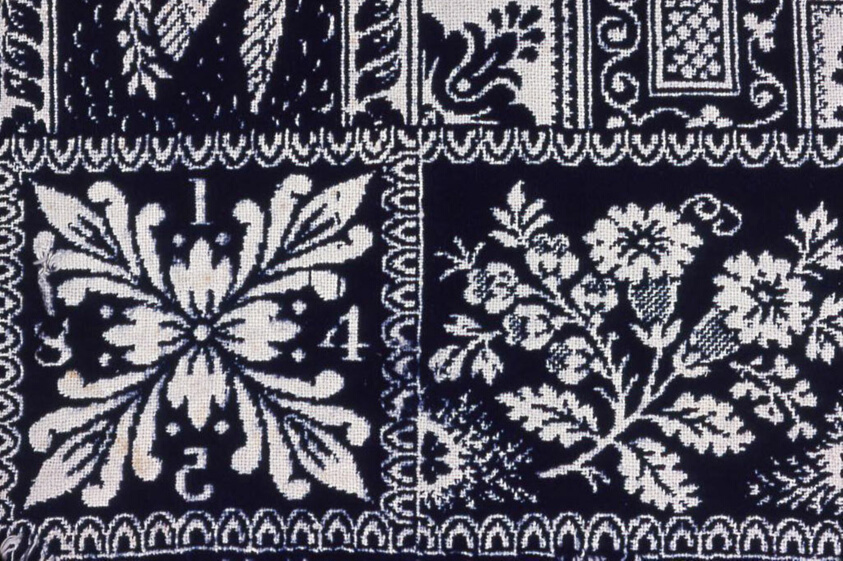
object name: Textile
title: Coverlet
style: 19th century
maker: Robert, Thomas, John or William Muir (American, born Scottish, active c. 1835-1857); United States, Indiana, Wayne County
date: 1845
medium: Cotton and wool, plain weave double cloth; woven on loom with Jacquard attachment; two loom widths joined; fringed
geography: Indiana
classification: weaving - coverlet; coverlet; weaving; textile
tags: eagles, geometric, vines, flowers, foliage, birds, bird, coverlet